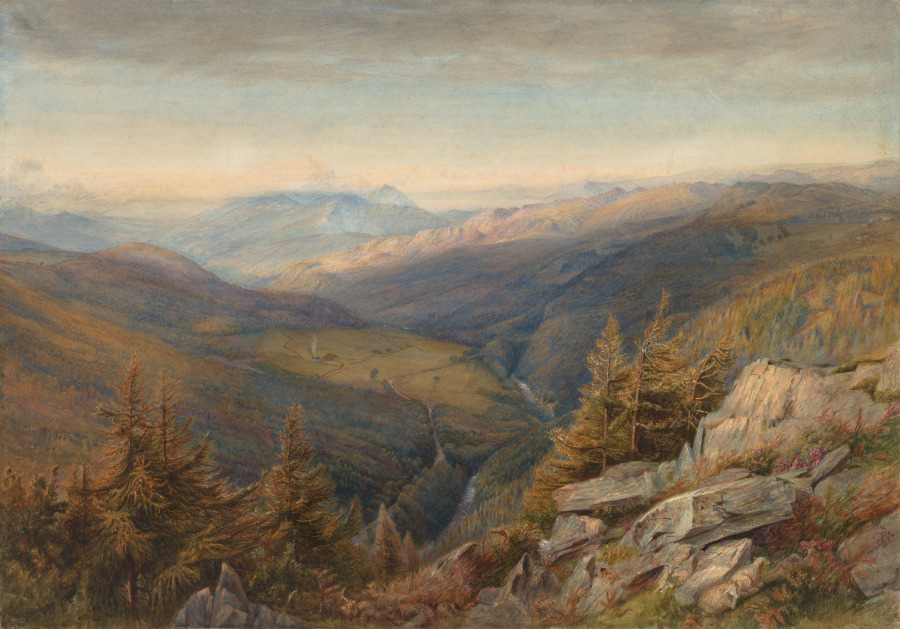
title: Mountain View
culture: America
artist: Robert J. Pattison (American, 1838–1903)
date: 1862–67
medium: Watercolor with graphite and touches of gouache and scraping on paper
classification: Drawing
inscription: Lower right, in purple watercolor: "RJP / 62" (or "67")